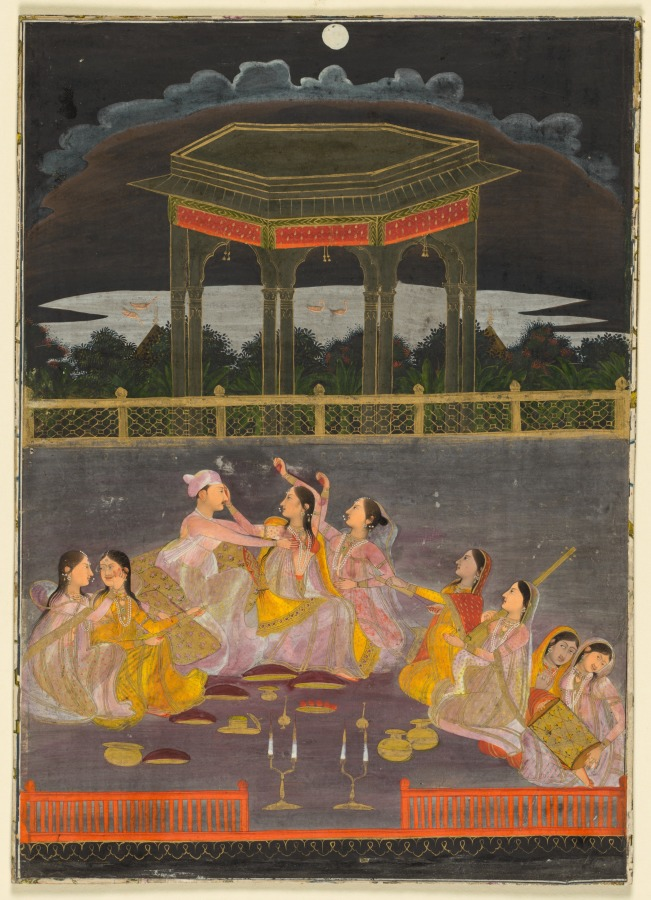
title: A prince celebrating Holi with palace women on a terrace at night (recto)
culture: India, Farrukhabad, Mughal, 18th century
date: c. 1760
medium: Gum tempera and gold on paper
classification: Painting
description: Images of pleasure and play abound in Mughal paintings of the latter half of the 1700s. Under a full moon reflected off a river and by the light of candles, a prince celebrates the spring festival of Holi with a group of palace women. Holi festivities include the boisterous tradition of smearing one another with colored powders—shown heaped on dishes—or shooting colored liquid using plunger guns.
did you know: Pairs of ducks swim under the full moon on the night of the vernal equinox.